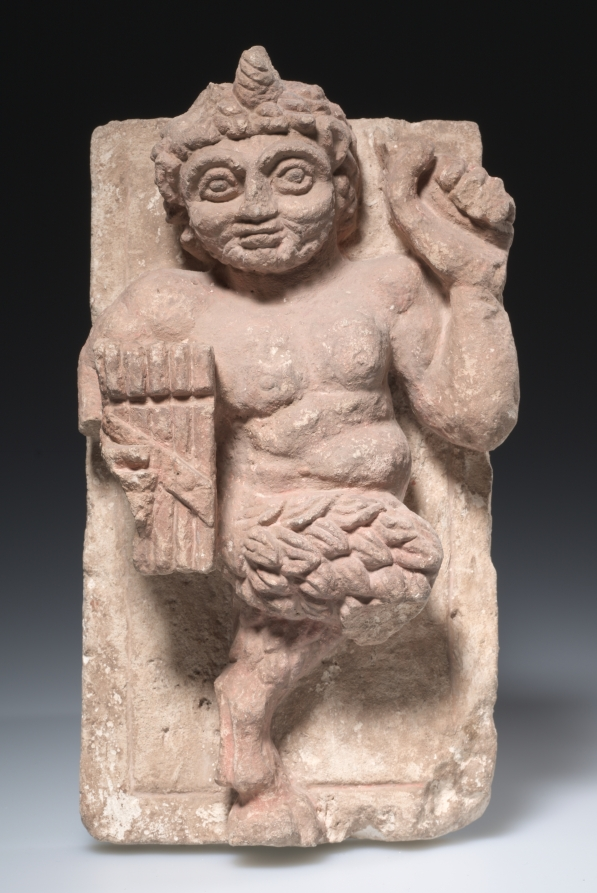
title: Dancing Pan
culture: Egypt, Coptic period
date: c. 350–500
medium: limestone with traces of red polychromy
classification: Sculpture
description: This relief sculpture demonstrates the survival of a purely pagan subject in the context of a Christian building. Even after the conversion of native Egyptians to Christianity, mythological subjects were not unusual in their art. Pan was the Greek god of woods and fields, flocks and herds, known in art by his goat's legs and pointed ears. He invented the reed pipes with which he charmed the nature goddesses known as nymphs.